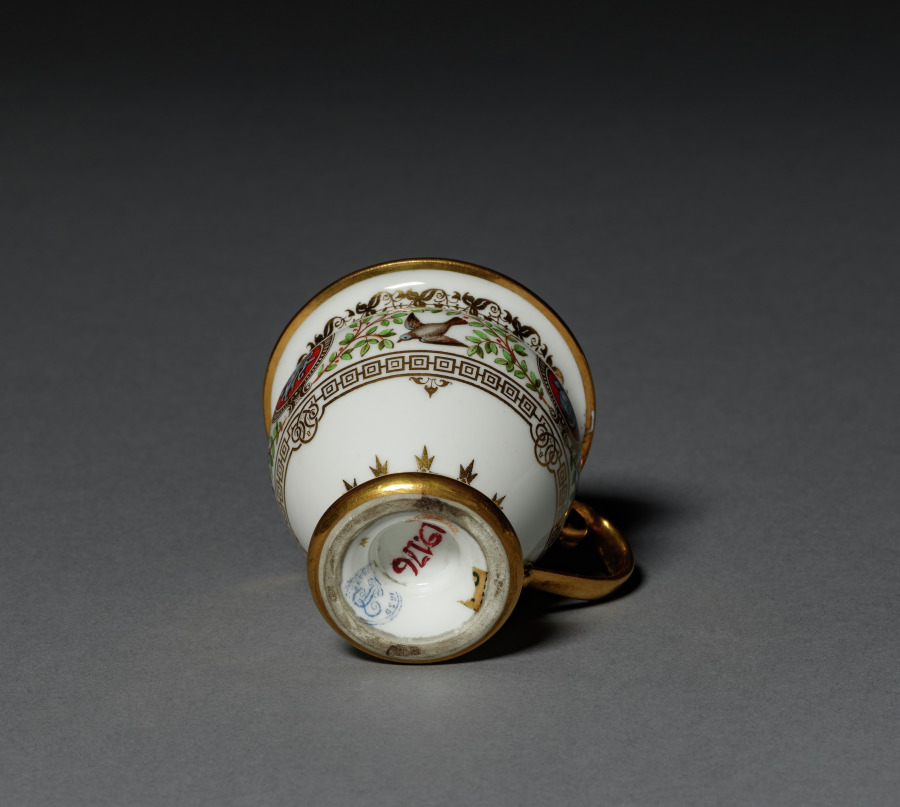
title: Cup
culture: France, Sèvres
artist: Sèvres Porcelain Factory (French, est. 1756)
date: 1839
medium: hard-paste porcelain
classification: Ceramic